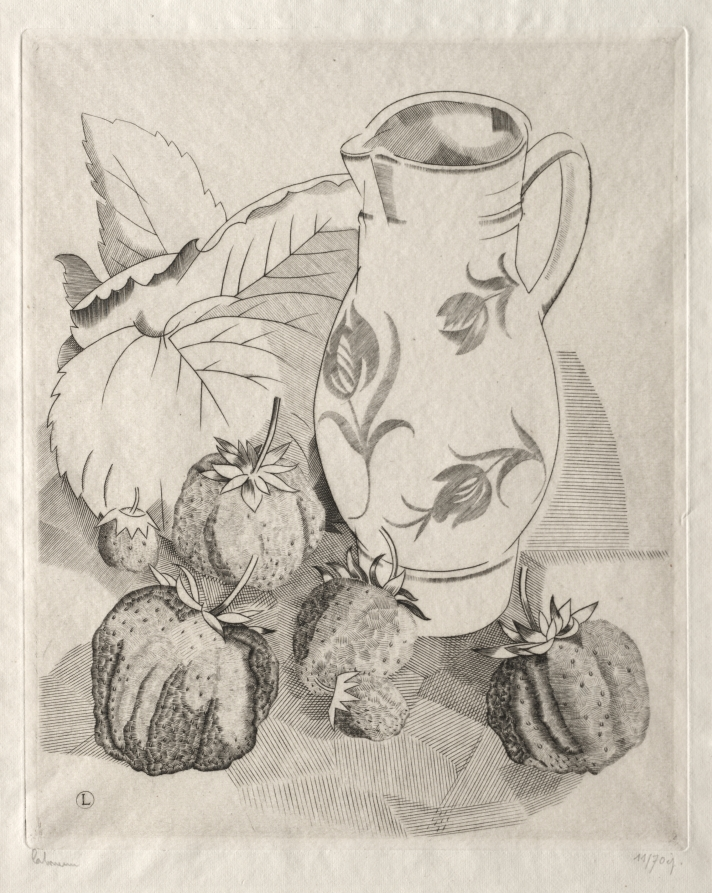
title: Strawberries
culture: France, 20th century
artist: Jean-Émile Laboureur (French, 1877–1943)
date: 1924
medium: engraving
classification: Print